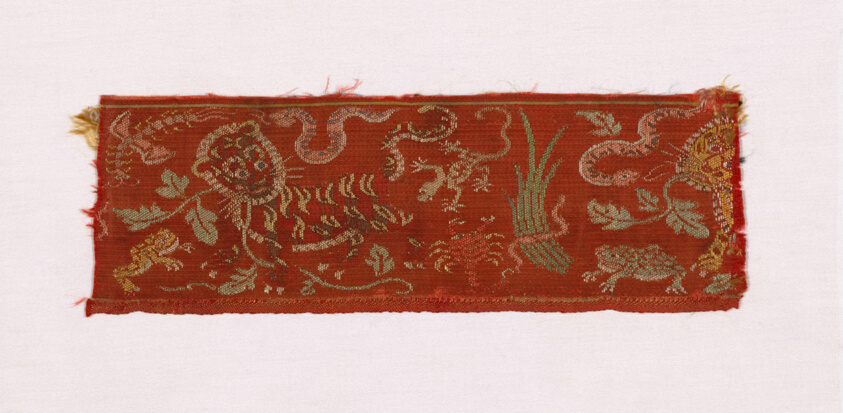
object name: Textile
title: Fragment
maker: China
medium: Silk and gold-leaf-over-lacquered-paper strip, satin weave with supplementary brocading wefts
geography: China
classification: textile; weaving